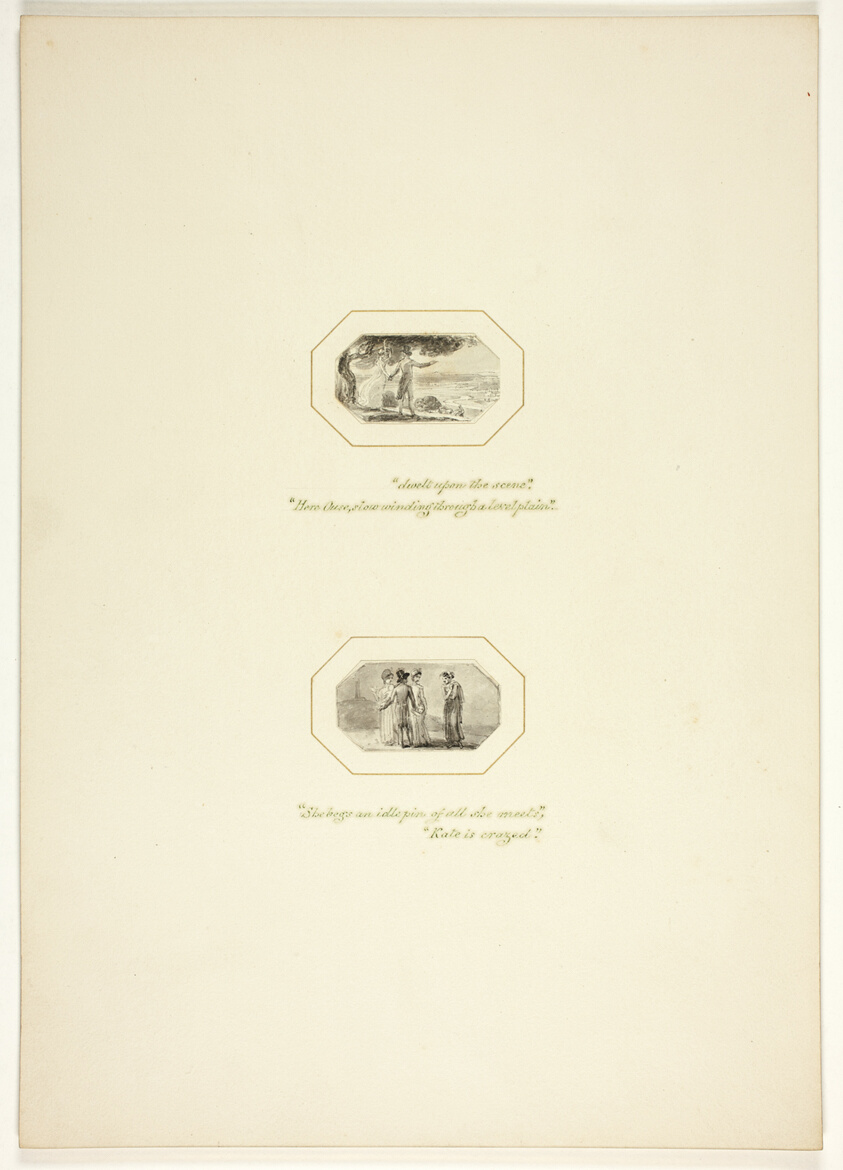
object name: Drawing and Watercolor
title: Study for a plate from The Task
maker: Thomas Stothard (English, 1755-1834)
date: c. 1800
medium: Ink wash on paper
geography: England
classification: ink or chalk wash; drawings (visual works); prints and drawing